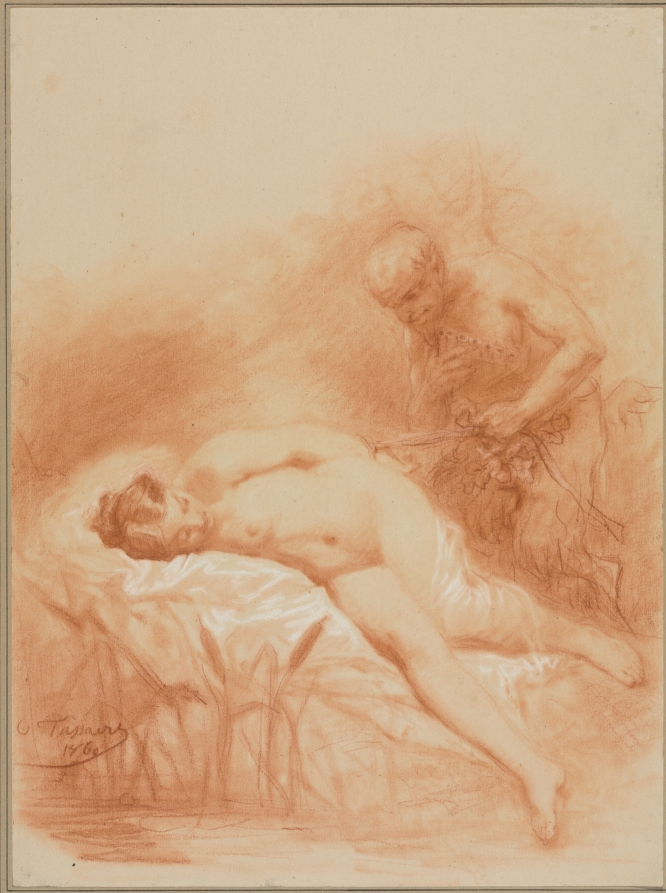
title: Nymphe et Faune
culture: France, 19th century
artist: Octave Tassaert (French, 1800–1874)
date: 1800s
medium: red chalk heightened with white chalk on off-white wove paper, pasted down.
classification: Drawing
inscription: Signed and dated, lower left in red chalk: O Tassaert/1860